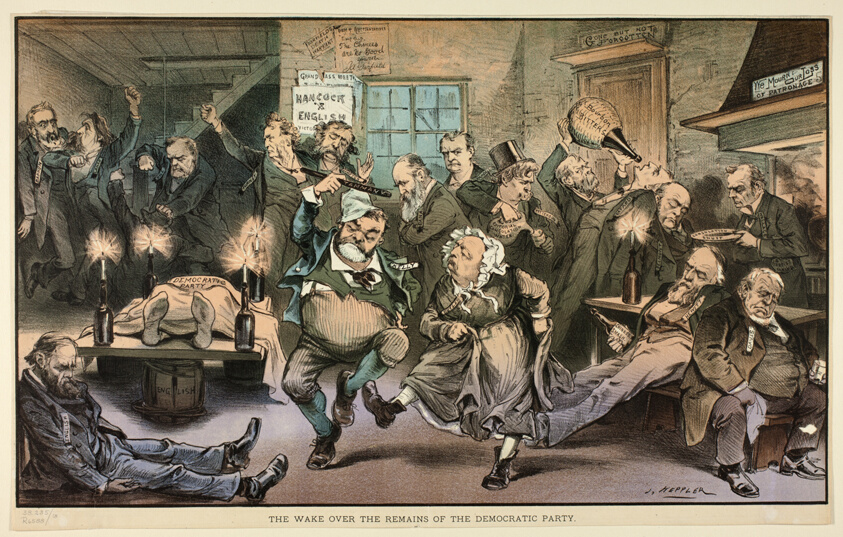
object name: Print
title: The Wake over the Remains of the Democratic Party, from Puck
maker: Joseph Keppler (American, 1838-1894)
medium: Color lithograph on newsprint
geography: United States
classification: lithograph; print; prints and drawing